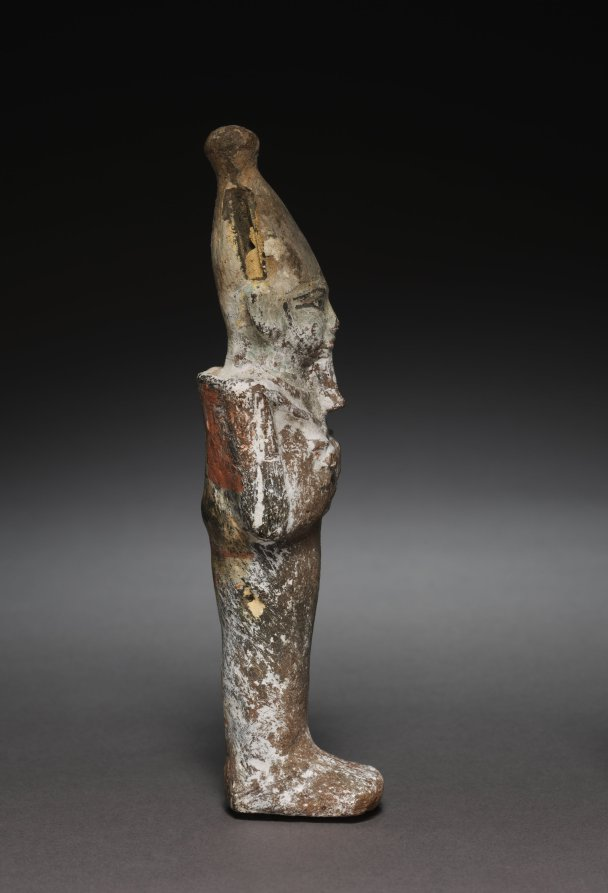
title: Statuette of Osiris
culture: Egypt, New Kingdom (1540–1069 BCE), Dynasties 19–20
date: 1295–1069 BCE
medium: painted terracotta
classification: Funerary Equipment